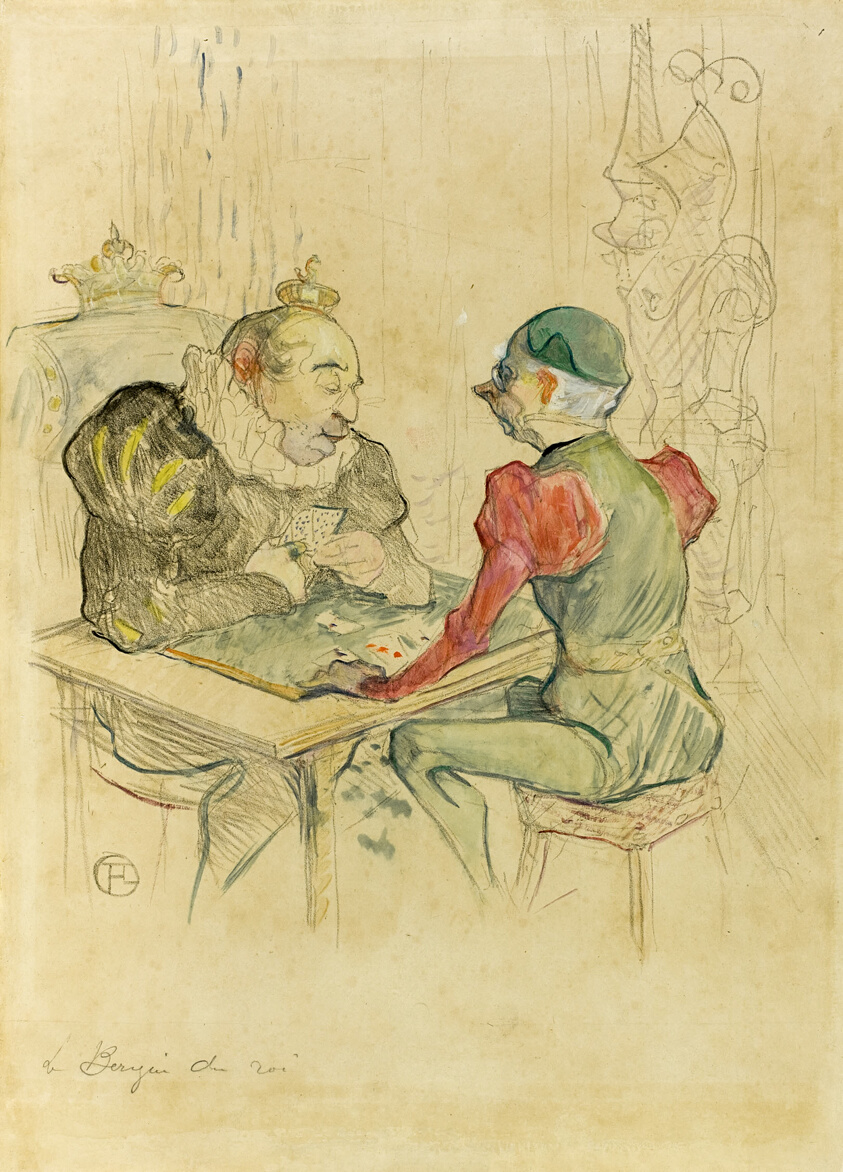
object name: Print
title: Le bézigue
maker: Henri de Toulouse-Lautrec (French, 1864-1901)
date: 1895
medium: Lithograph with hand-coloring, on tan wove paper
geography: France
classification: lithograph; print; prints and drawing